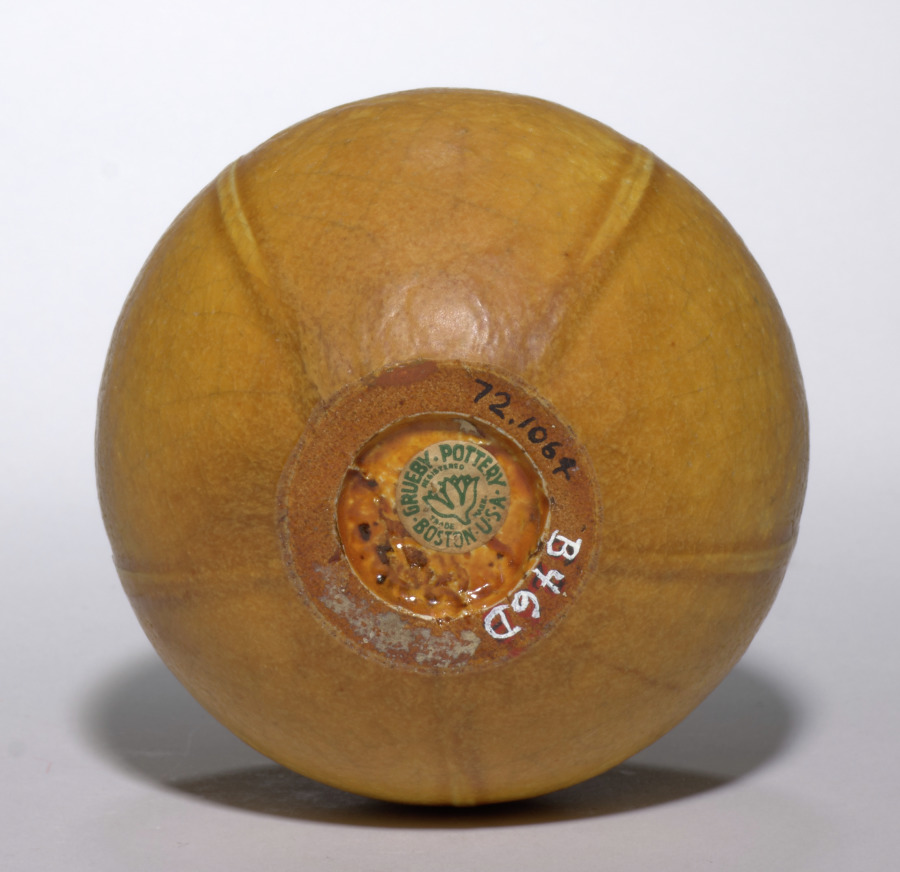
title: Vase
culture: America, Massachusetts, Boston, early 20th Century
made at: Grueby Pottery Company (American)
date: c. 1900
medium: ceramic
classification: Ceramic